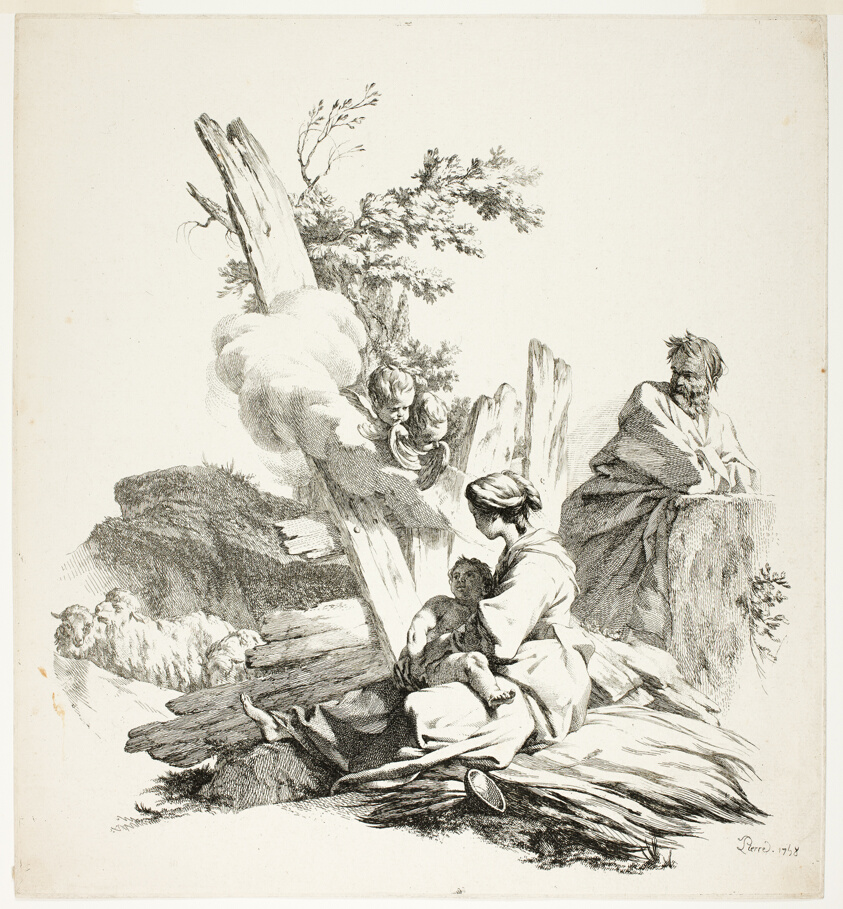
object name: Print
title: The Flight into Egypt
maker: Jean Baptiste Marie Pierre (French, 1713-1789)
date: 1758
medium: Etching on paper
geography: France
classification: etching; print; prints and drawing